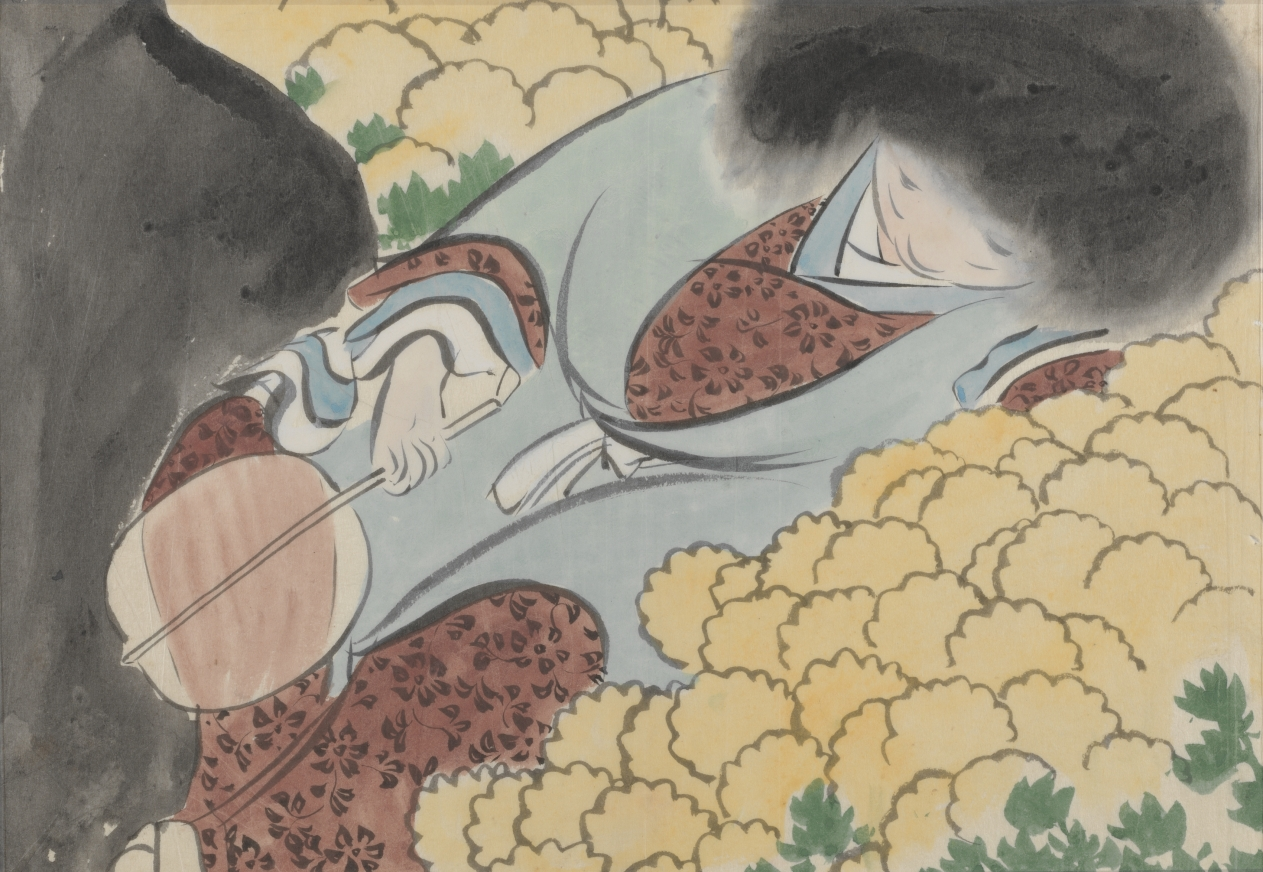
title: Flowers of a Hundred Worlds (Momoyogusa): Chrysanthemum Boy (Kikujidō)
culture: Japan, Meiji period (1868–1912)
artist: Kamisaka Sekka (Japanese, 1866–1942)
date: 1909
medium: ink and color on paper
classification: Drawing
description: Kamisaka Sekka made preparatory drawings for his Flowers of a Hundred Worlds series on tracing paper with ink and color. The freehand sketches are much looser than the finished, printed compositions.